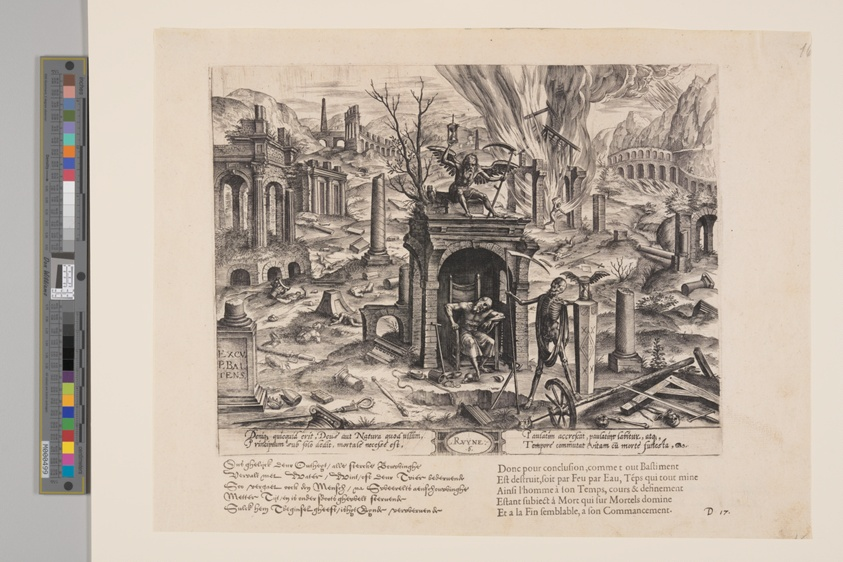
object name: Print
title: Ruyne, from Theatrum Vitae Humanae (The Ages of Man)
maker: Jan Wierix (Flemish, 1549–c. 1618)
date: 1577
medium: Engraving on ivory laid paper, with letterpress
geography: Flanders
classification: engraving; paper; print; prints and drawing